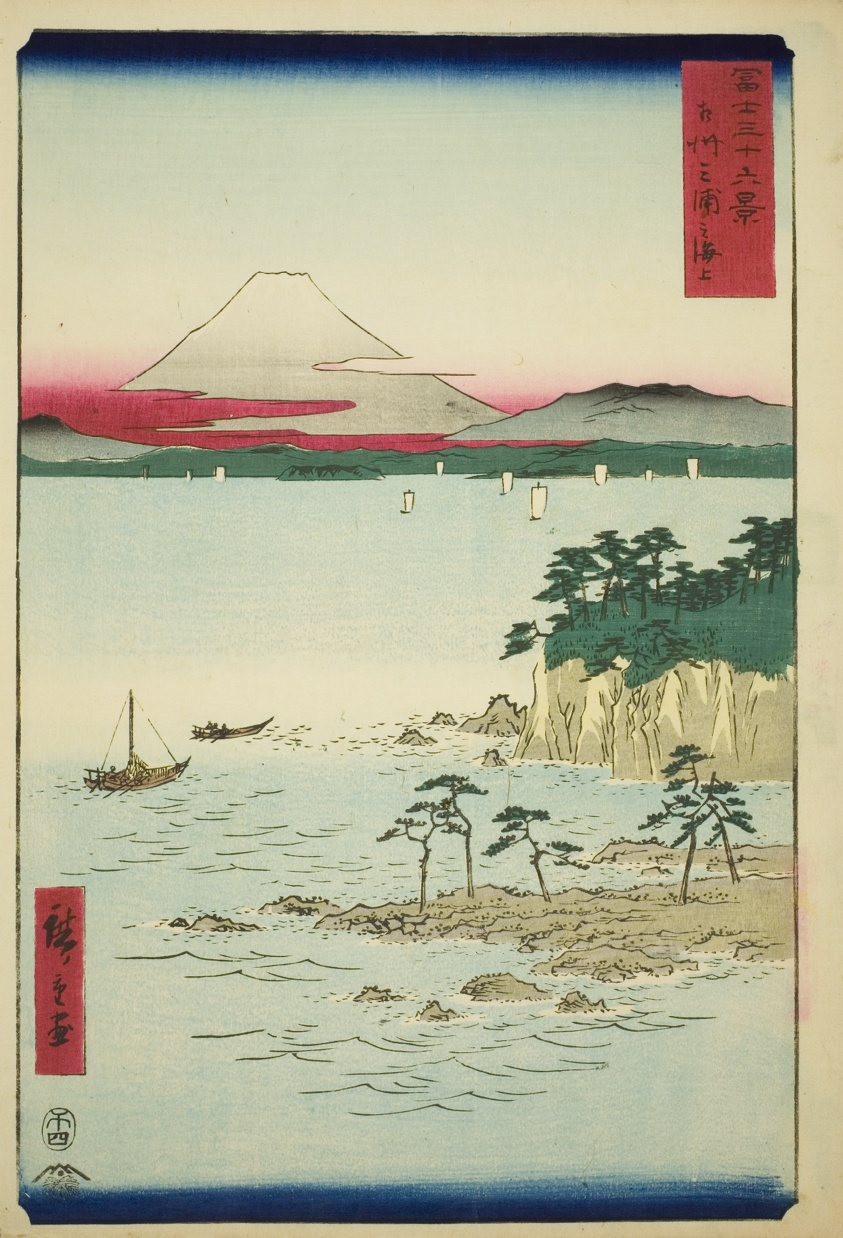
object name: Print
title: The Sea at Miura in Sagami Province (Soshu Miura no kaijo), from the series "Thirty-six Views of Mount Fuji (Fuji sanjurokkei)"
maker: Utagawa Hiroshige 歌川 広重; Japanese, 1797-1858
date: 1858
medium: Color woodblock print; oban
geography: Japan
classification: print; asian art